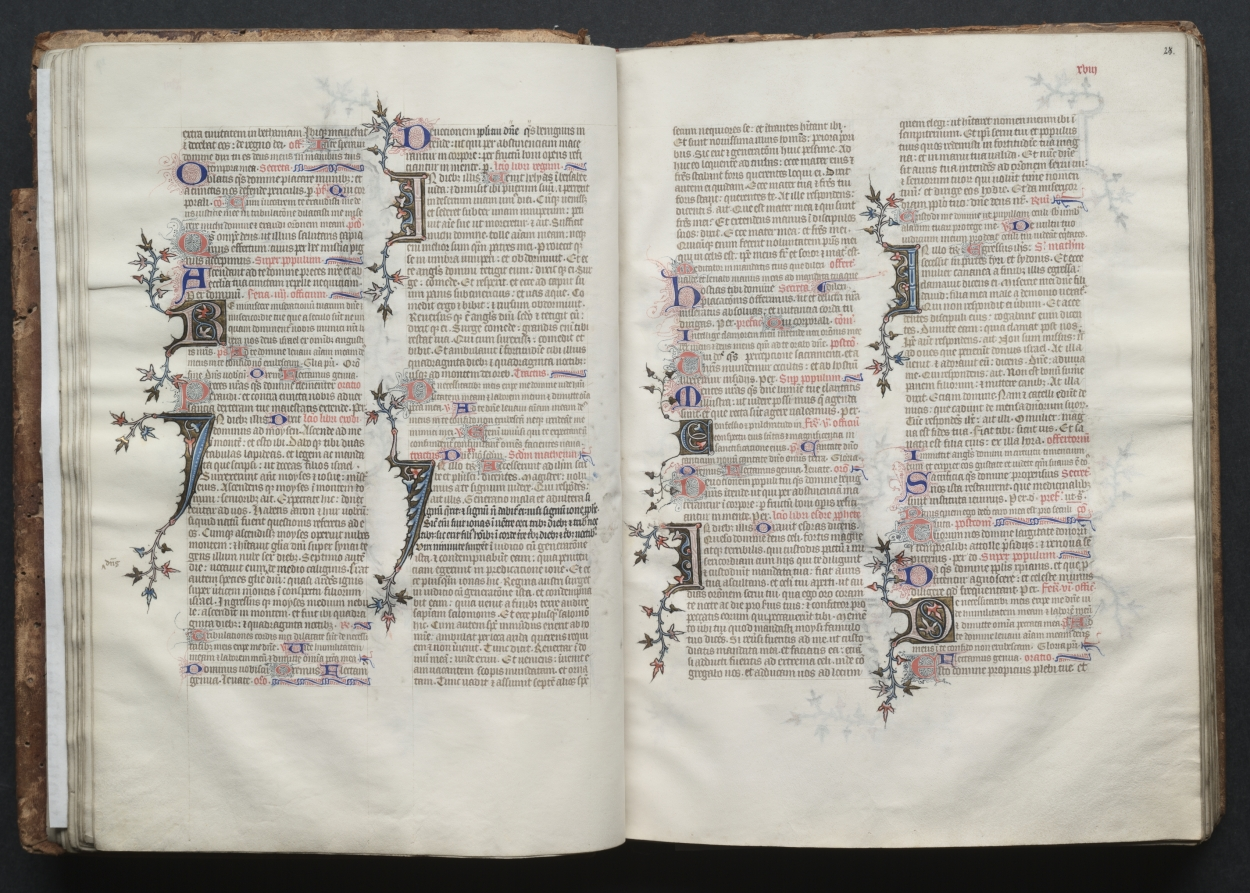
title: The Gotha Missal: Fol. 28r, Text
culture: France, Paris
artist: Master of the Boqueteaux (French)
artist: and Workshop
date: c. 1375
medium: ink, tempera, and gold on vellum; blind-tooled leather binding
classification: Bound Volume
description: The style and quality of this manuscript's decoration is typical of deluxe Parisian books made for aristocratic or royal patrons. Most of the book's decoration appears to be the work of the Master of the Boqueteaux, an artist active at the court of King Charles V (died 1380). His style was apparently shared by a number of book illuminators working in and around Paris. It is very possible that the Gotha Missal belonged to Charles V, but is not provable because the manuscript has no royal portraits and lacks a colophon. Given the book's magnificent decoration, however, it would seem that it was produced for a Valois prince, if not for the king himself. The manuscript receives its name from the German dukes of Gotha, its later owners.